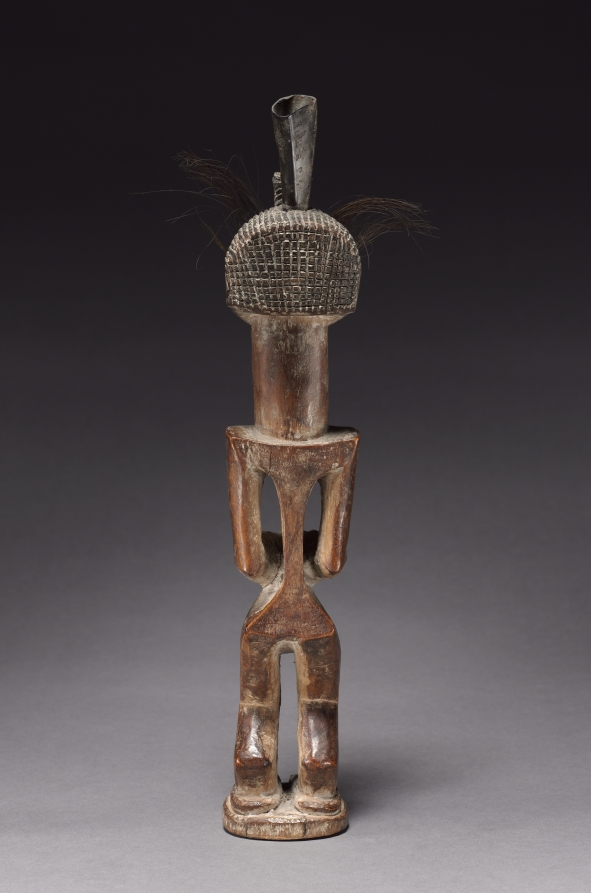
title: Female Figure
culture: Africa, Democratic Republic of the Congo, Songye people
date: late 1800s-early 1900s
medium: Wood, upholstery studs, antelope horns, and animal hair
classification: Sculpture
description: Mankishi figures were believed to have magical powers and were used by diviners to contact spirits in otherworldly realms. Smaller, personal power figures were used to connect with “common” ancestors, while the larger Mankishi figures contacted higher-ranking ancestral spirits. These power figures were kept in their own personal spaces because of their powerful status, and could only be handled by their designated nkunja, or guardian.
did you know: Because this Mankishi is neither small or quite large in size, it was most likely used by a family rather than an individual.